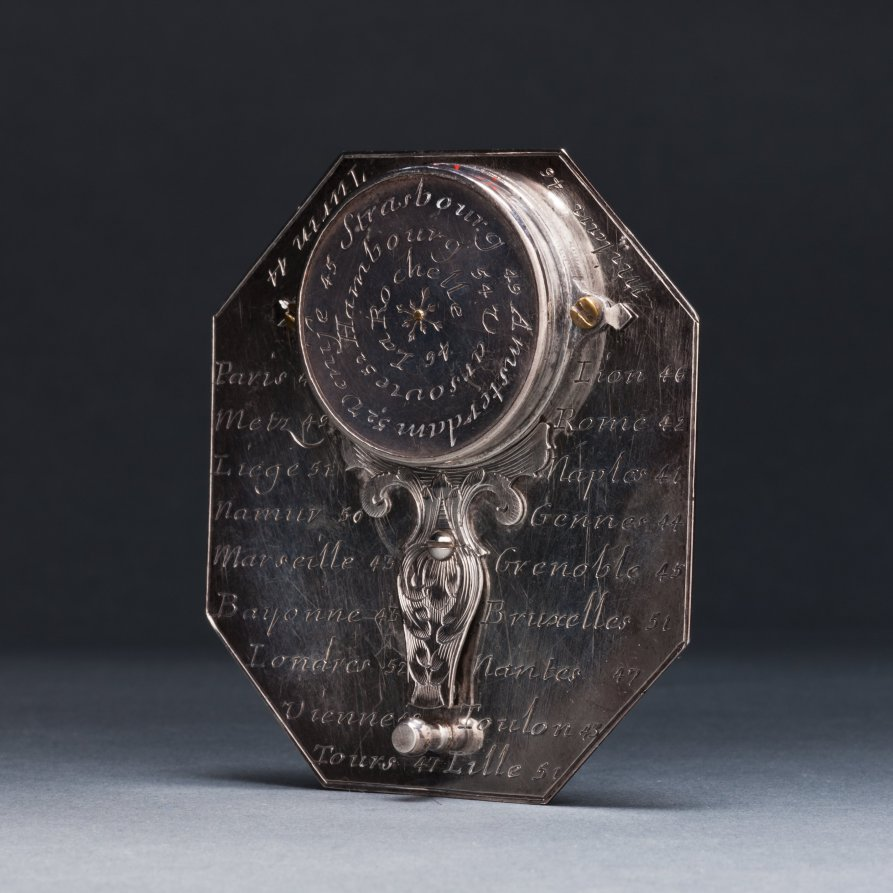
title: Butterfield Sundial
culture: France, 18th century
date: 1700s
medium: silver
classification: Silver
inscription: [Engraved signature above the compass in ribbon band]: "N. BION A Paris"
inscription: [Engraved on the face of the sundial]: “Pour 55° 4-5-6-7-8-9-10-11 50° IIII-V-VI-VII-VIII-IX-X-XI 45° 5-6-7-8-9-10-11 40° -VI-VII-VIII-IX-X-XI'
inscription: [Engraved on the other side]: "Pour 55° -8-7-6-5-4-3-2-1-0 50°-VIII-VII-VI-V-IIII-III-II-I 45°-8-7-6-5-4-3-2-1 40°-VII-VI-V-IIII-III-II-I"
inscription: [Engraved around the compass]: “NORD-OUEST-SUD-EST”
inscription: [Engraved on the back of the sundial]: “Turin 44 Milan 46 Paris 49 Lion 46 Metz 49 Rome 42 Liege 51 Naples 44 Namur 50 Gennes 44 Marseille 43 Grenoble 45 Bayonne 43 Bruxelle 51 Londres 52 Nantes 47 Vienne 48 Toulon 43 Tours 47 Lille 51”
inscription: [Engraved around the back of the compass]: “Venise 45 Strasbourg 49 Amsterdam 52 Hambourg 54 Varsovie 52 La Rochelle 46”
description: Butterfield-type sundials are characterized by their adjustable gnomons, metal flaps that cast a shadow on the dial’s face to indicate the hour, and geographical indices. This sundial has a scale adjustable between latitudes of 40° to 60° north. The latitudes of 26 European towns are engraved on its back for quick reference. With an intricately engraved silver face, it would have functioned as a fashionable traveler’s accessory.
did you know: Butterfield-style sundials were named after Micheal Butterfield, an English scientific and mathematical instrument maker who worked in Paris between 1674 and 1724.